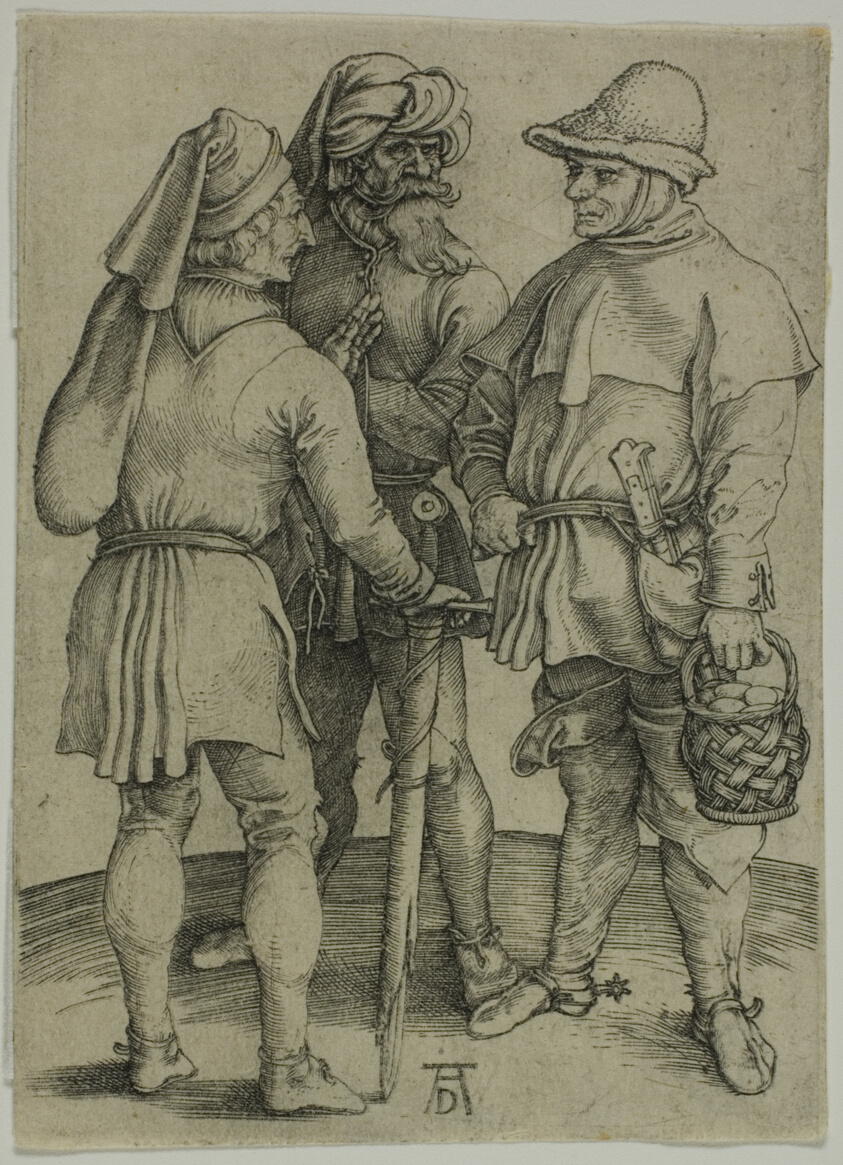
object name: Print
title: Three Peasants in Conversation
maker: Albrecht Dürer (German, 1471-1528)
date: c. 1497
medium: Engraving in black on ivory laid paper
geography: Germany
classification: engraving; print; prints and drawing; paper